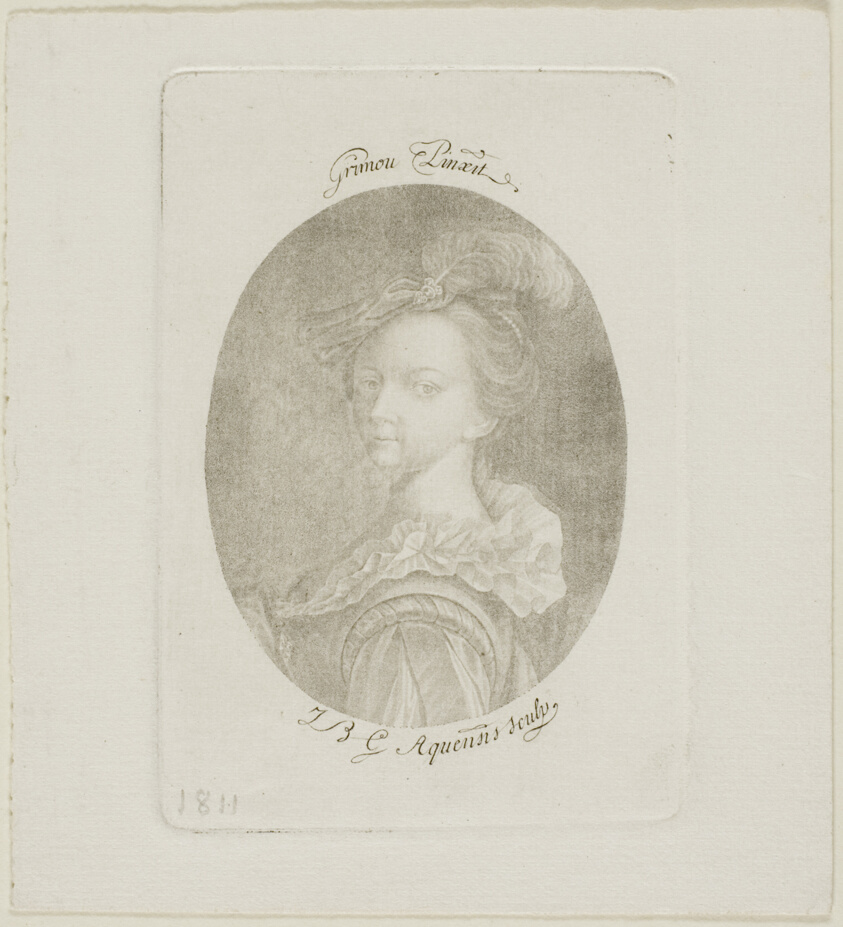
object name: Print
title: The Young Spainard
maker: Jean-Baptiste de Grateloup (French, 1735-1817); Jean Pierre Sylvestre (French)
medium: Engraving on paper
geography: France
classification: aquatint; print; prints and drawing